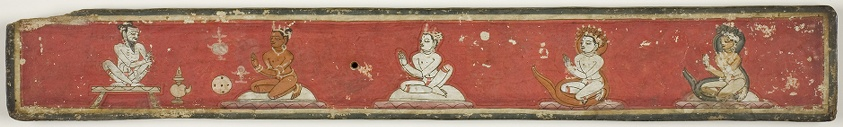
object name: Book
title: Hindu Manuscript Cover with Two Disciples and a Naga King and Queen Seated Before a Sage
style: Himalayan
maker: Nepal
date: late 15th/early 16th century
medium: Pigments and metallic paint on wood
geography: Nepal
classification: wood; asian art; book